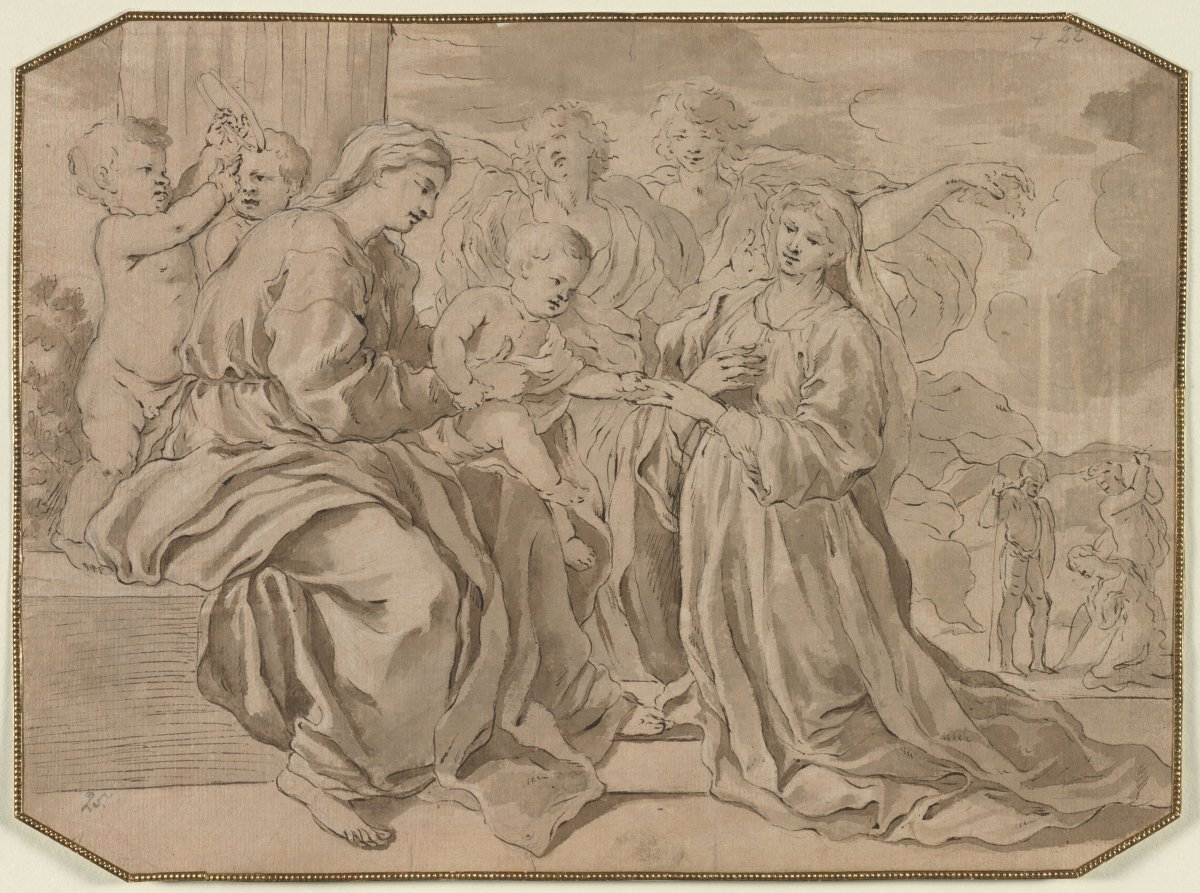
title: Mystic Marriage of St. Catherine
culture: Italy, 17th century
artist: copy after Nicolas Poussin (French, 1594–1665)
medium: pen and brown ink and brush and gray and brown wash, over black chalk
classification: Drawing